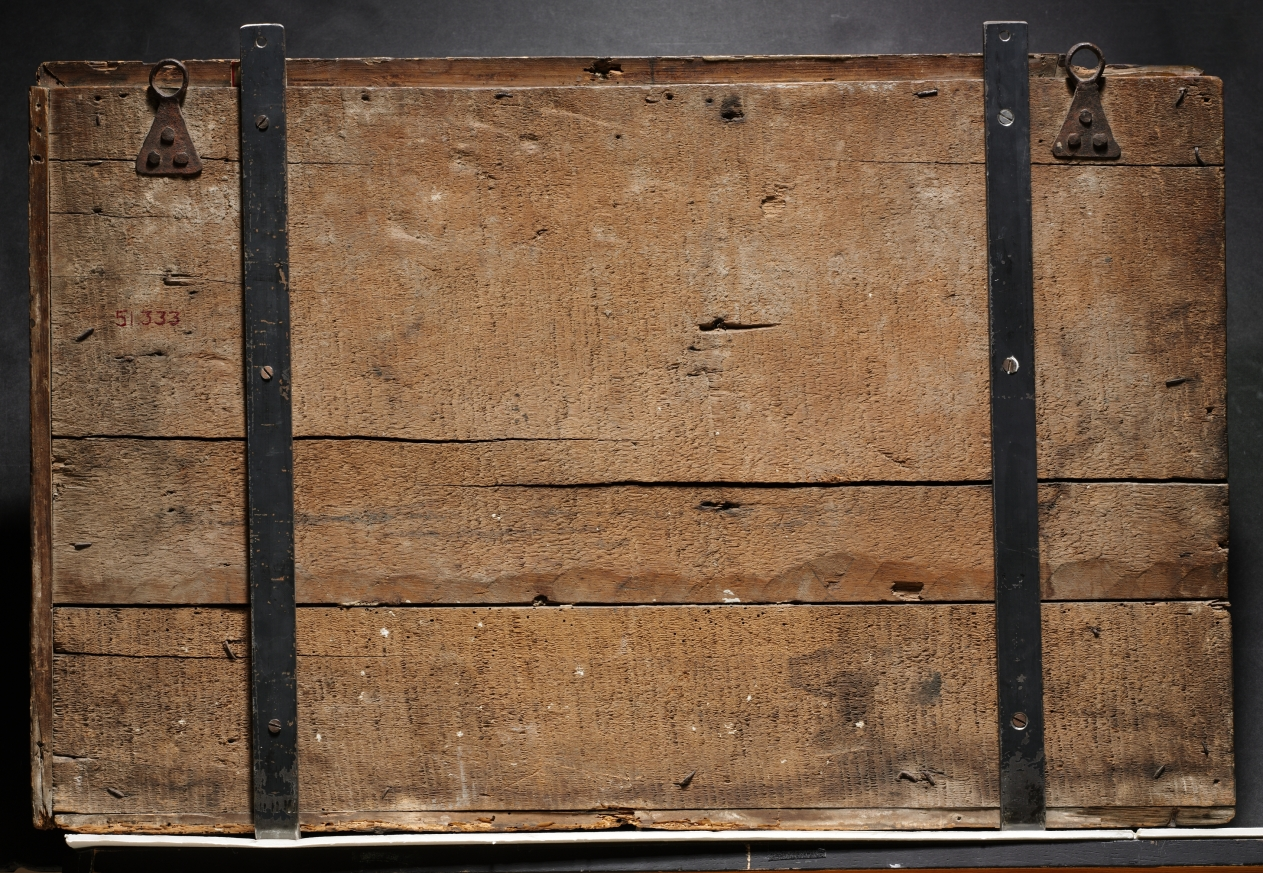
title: The Raising of Lazarus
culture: Italy, Rome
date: c. 1725–50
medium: gilded terracotta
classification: Sculpture